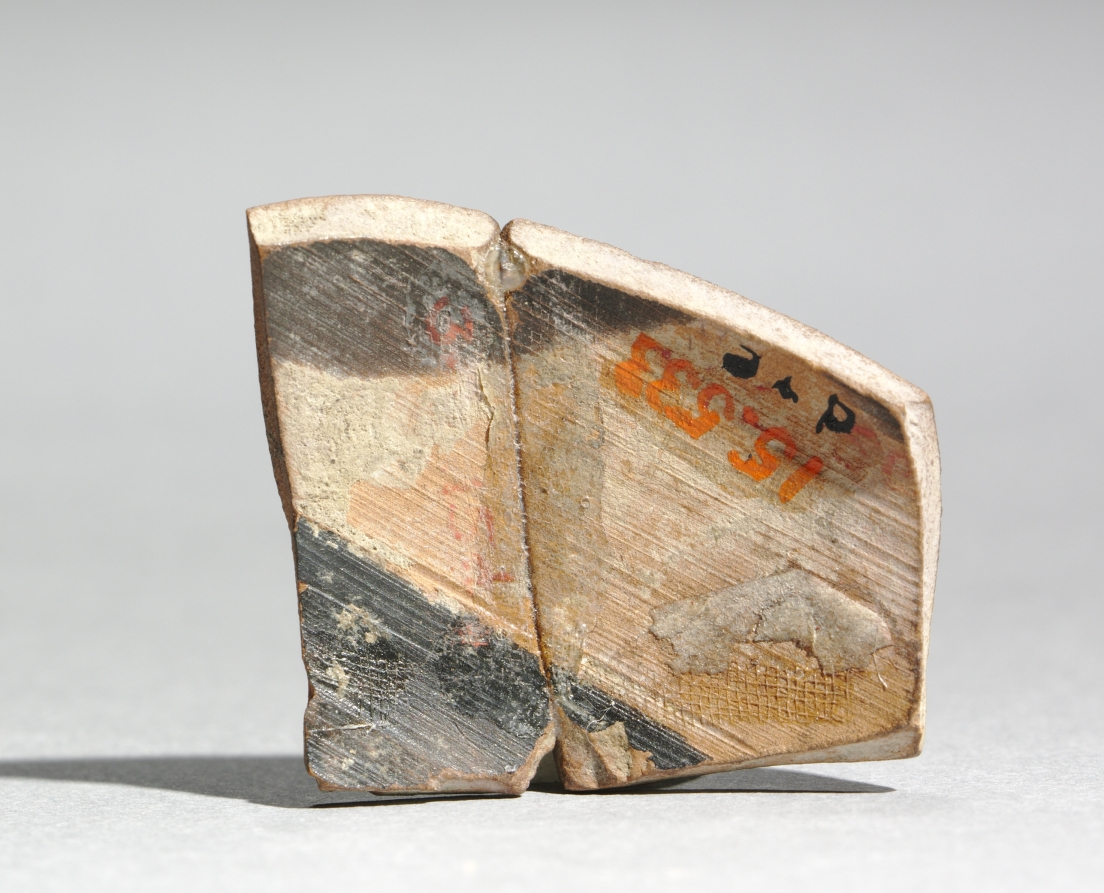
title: Fragment from Red-Figure Oinochoe (Wine Jug) or Hydria (Water Jar): Woman Holding Box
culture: Greek, Attic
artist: attributed to Shuvalov Painter (Greek, Attic, active c. 440–410 BCE)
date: c. 425–420 BCE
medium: ceramic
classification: Ceramic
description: The relatively large eyes and head of this seated woman are characteristic of figures painted by the Shuvalov Painter, a painter known to have painted numerous small vases during the mid- to late fifth century BC. Along with many mythological subjects, the Shuvalov Painter often showed women in domestic settings, as here; the box or chest she holds could be a bridal gift.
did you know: The Shuvalov Painter is named after the former owner of an amphora now in the Hermitage.